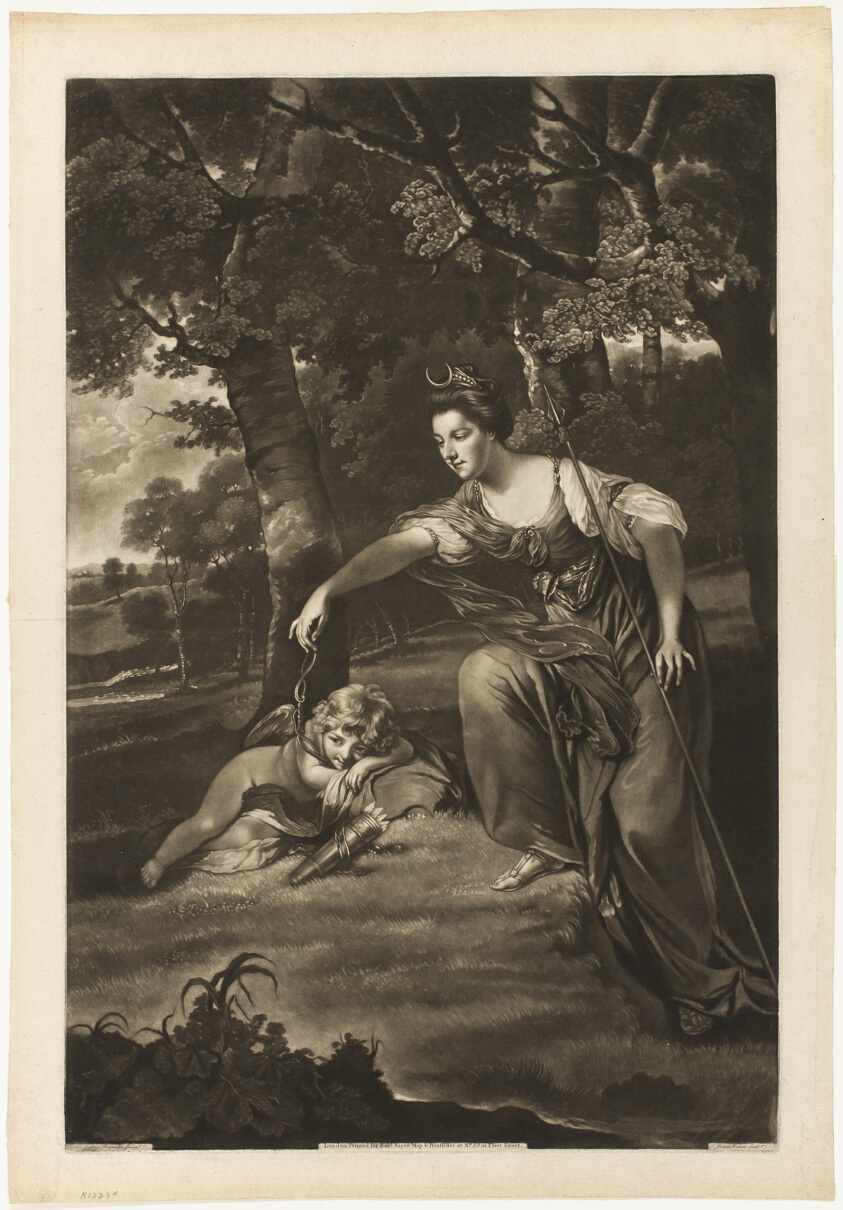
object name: Print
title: Elizabeth, Duchess of Manchester and Her Son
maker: James Watson (Irish, c. 1740-1790); after Sir Joshua Reynolds (English, 1723-1792)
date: c. 1770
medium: Mezzotint on cream laid paper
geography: Ireland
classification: mezzotint; print; prints and drawing